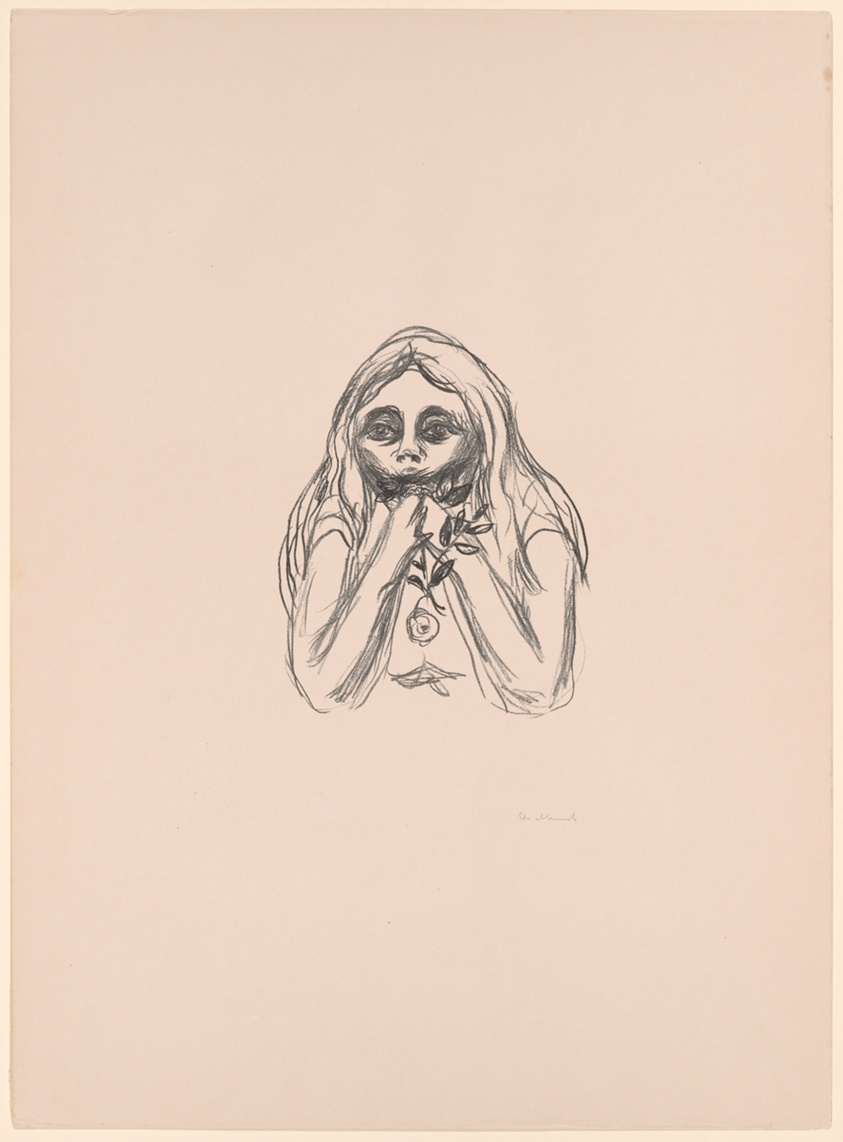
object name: Print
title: Omega's Eyes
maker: Edvard Munch (Norwegian, 1863-1944)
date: 1908/09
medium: Lithograph on paper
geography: Norway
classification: lithograph; print; prints and drawing